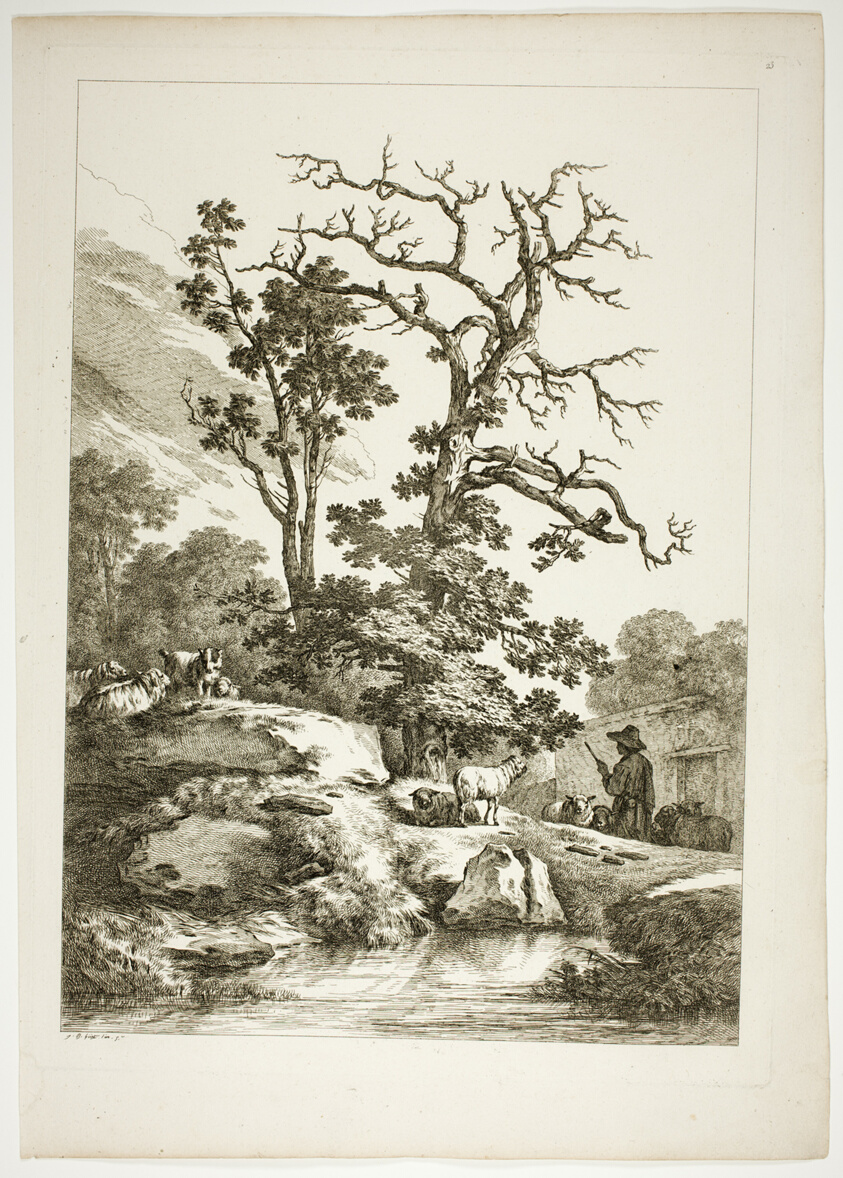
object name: Print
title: Plate 23 of 38 from Oeuvres de J. B. Huet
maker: Jean Baptiste Huet (French, 1745-1811)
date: 1796–99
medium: Etching on paper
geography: France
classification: etching; print; prints and drawing